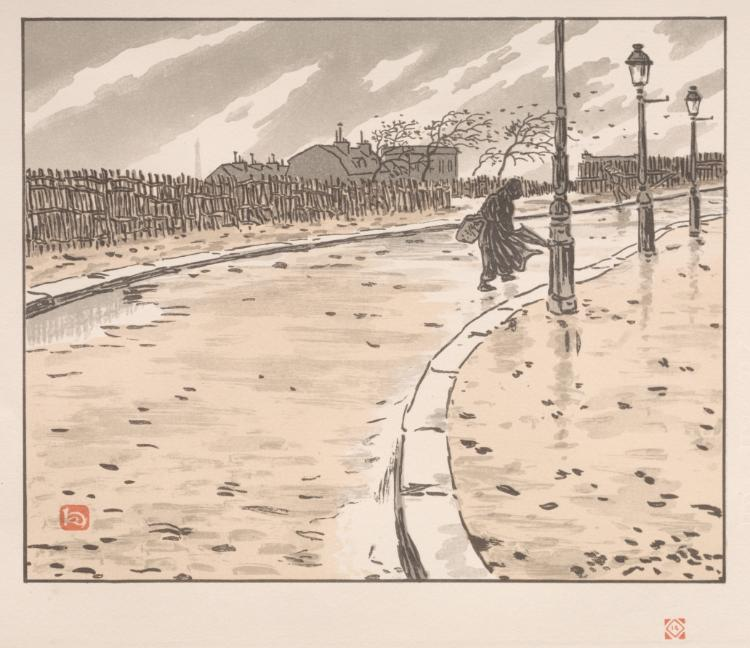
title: Thirty-Six Views of the Eiffel Tower: From Lamarck Street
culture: France, early 20th century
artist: Henri Rivière (French, 1864–1951)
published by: Printed by Verneau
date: 1902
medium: color lithograph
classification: Print